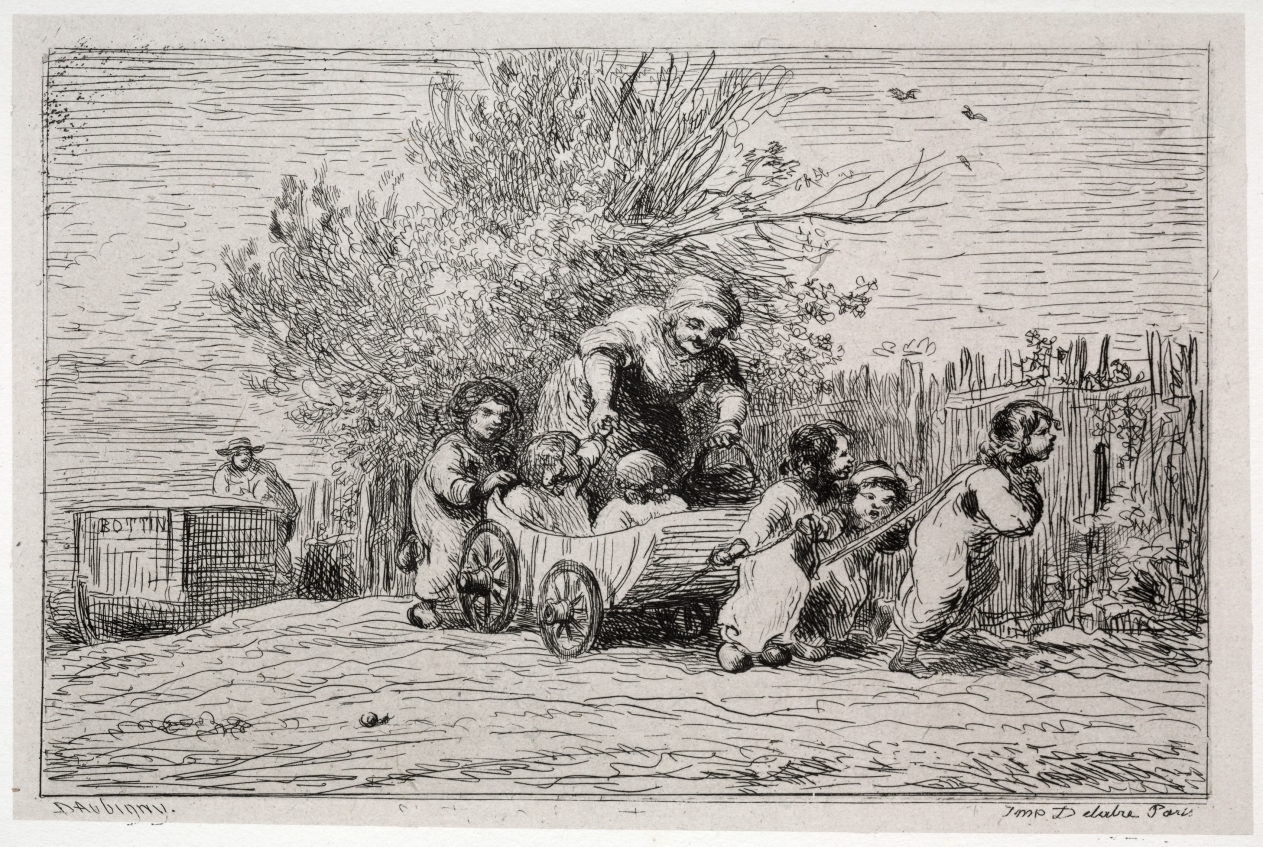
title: The Boat Trip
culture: France, 19th century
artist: Charles François Daubigny (French, 1817–1878)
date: 1861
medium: 16 etchings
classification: Portfolio